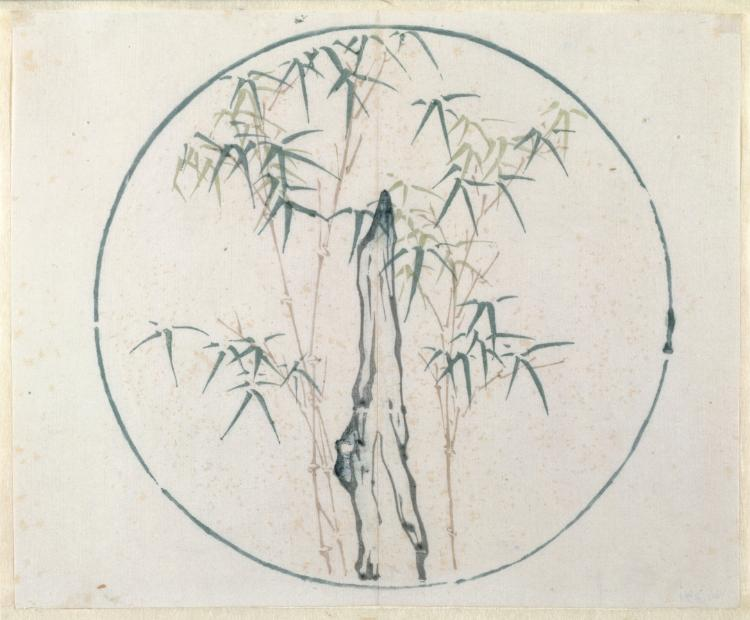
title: Bamboo and Rock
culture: China, Ming dynasty (1368-1644) or later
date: 1368–1644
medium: color woodblock print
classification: Print